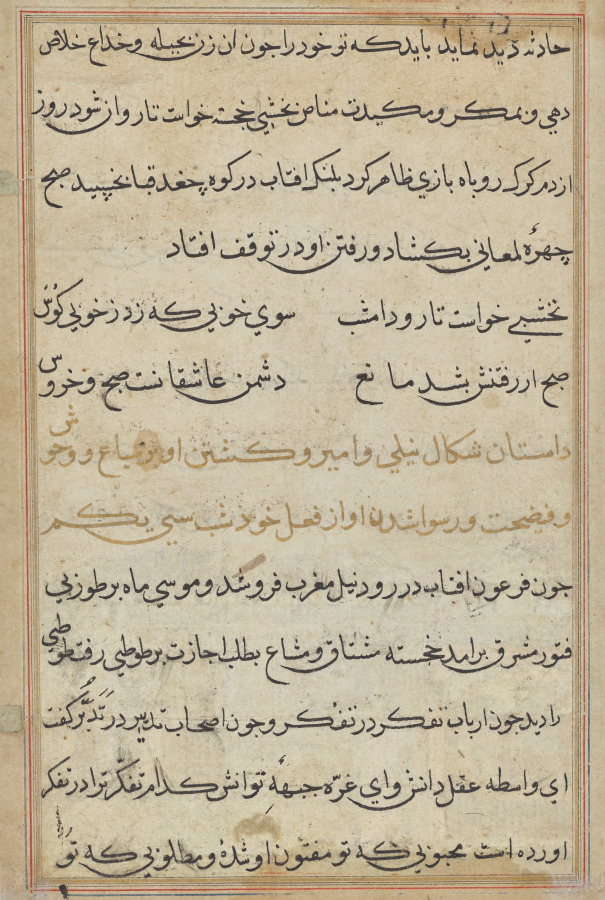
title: Page from Tales of a Parrot (Tuti-nama): text page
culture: India, Mughal court, 16th century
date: 1558–60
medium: gum tempera, ink, and gold on paper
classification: Painting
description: Many of the illustrations from the latter portion of the book reveal more confidence in naturalistic spatial renderings. The space of the courtyard, roof, bedroom niche, and the dimensionality of the parrot’s perch are all more convincing than those of the Fifteenth Night on the wall to the left. On this night the parrot is telling Khujasta that he is worried about whether or not her lover is of noble ancestry. She asked him how she could find out his true lineage. The parrot answered that he would eventually betray himself by his speech or behavior, if he were of low breeding. He then told the story about the donkey in a lion’s skin.